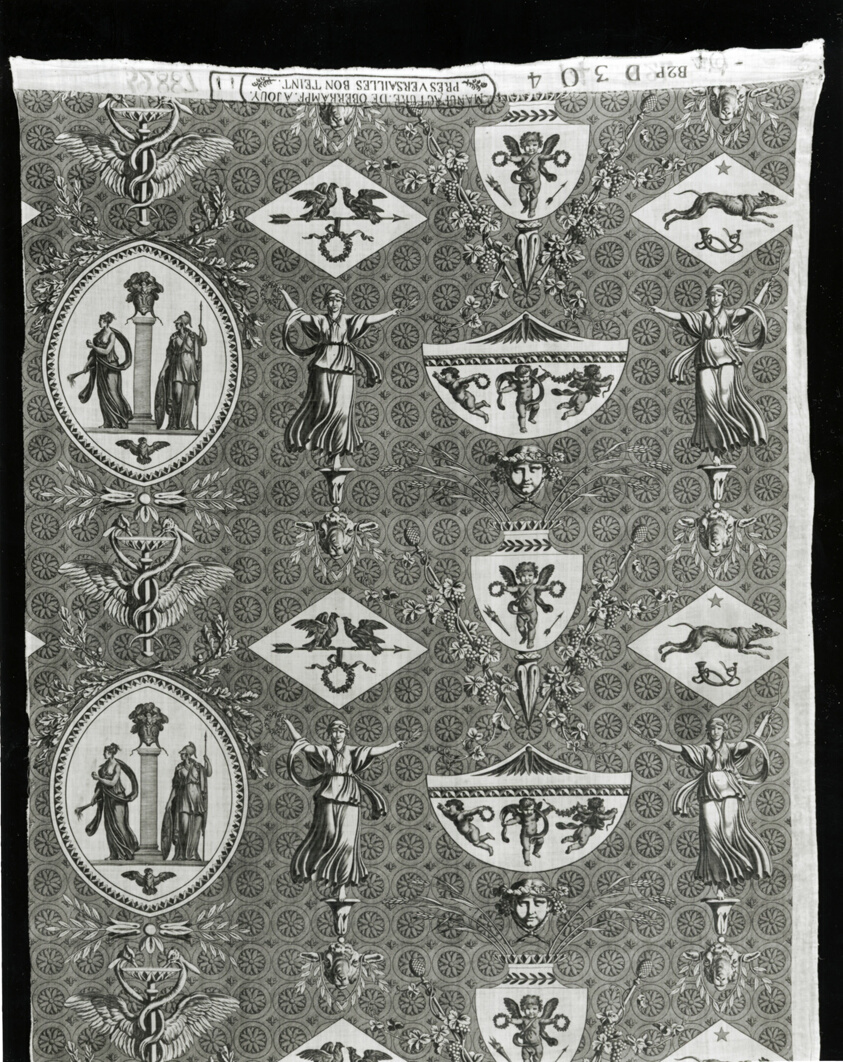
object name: Textile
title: Venus and Minerva (Furnishing Fabric)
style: jouy-en-Josas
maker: Designed by Jean Baptiste Huet (French, 1745–1811); Manufactured by Christophe-Philippe Oberkampf (naturalized French, 1738-1815), Oberkampf Manufactory (French, 1760-1843); Jouy-en-Josas, France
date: c. 1805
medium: Cotton, plain weave; engraved roller printed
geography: Jouy-en-Josas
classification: textile; weaving - printed; furnishing textile